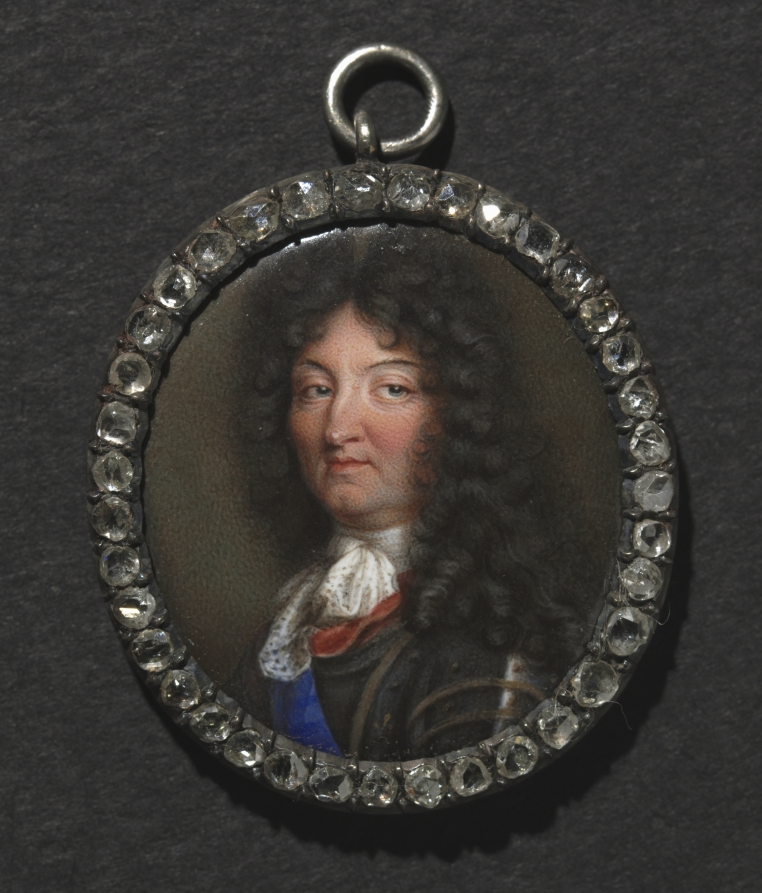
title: Portrait of King Louis XIV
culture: France, 17th century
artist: school of Jean Petitot (Swiss, 1607–1691)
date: 17th century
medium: enamel in a silver and diamond frame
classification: Portrait Miniature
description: Unlike fragile portrait miniatures painted in watercolor on vellum or ivory, which are prone to cracking, fading, and flaking, enamels are resilient, impervious to the effects of light, and retain their striking original colors over time. Partly for this reason enamel was considered ideal for reproducing famous paintings and treasured portraits in a reduced and luminous form. The complicated and labor-intensive process of enameling required the artist to fire numerous layers of colored metal oxide at different temperatures. This process made it difficult to produce a faithful portrait likeness, though masters of the medium were able create portraits of remarkable subtlety imbued with the sitter's personality. The heyday of enamel painting was the late-seventeenth and early eighteenth centuries. Among the enamel specialists was the Swiss Jean Petitot, who was patronized by English King Charles I, French King Louis XIV, and Polish King John III Sobieski. His workshop produced many versions of this portrait of King Louis XIV, which would have been much in demand as a diplomatic gift from the king to loyal courtiers or foreign allies.